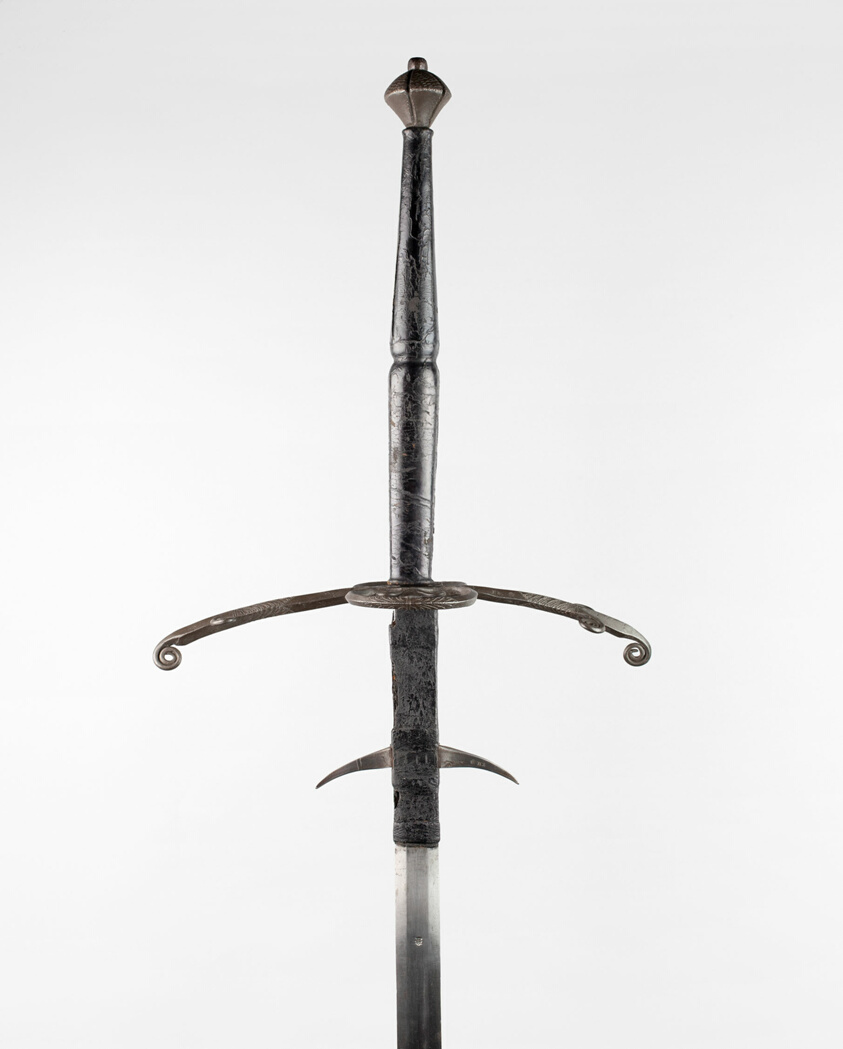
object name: Arms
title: Two-Handed Sword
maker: German, possibly Munich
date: 1580-1600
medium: Steel, iron, wood, and leather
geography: Germany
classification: edged weapon-sword; arms; arms and armor